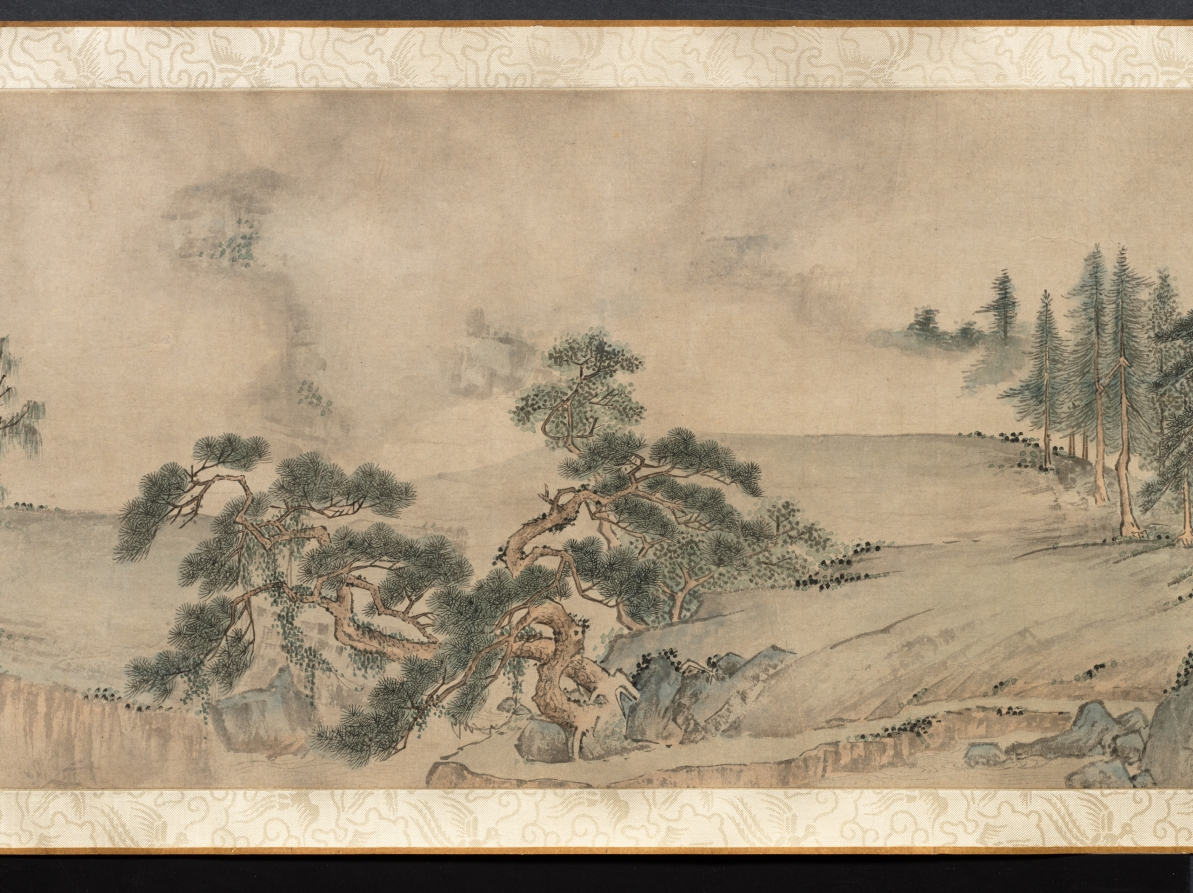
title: Ten Thousand Li of the Yangzi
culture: China, Ming dynasty (1368–1644)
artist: Dai Jin (Chinese, 1388–1462)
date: c. 1400s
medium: Handscroll; ink and color on paper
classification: Painting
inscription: Two colophons at end. Artist's seals: Dai Jin 戴進 and Wenjin 文進.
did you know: Dai Jin is traditionally considered the founder of the Zhe School, a style of landscape painting.